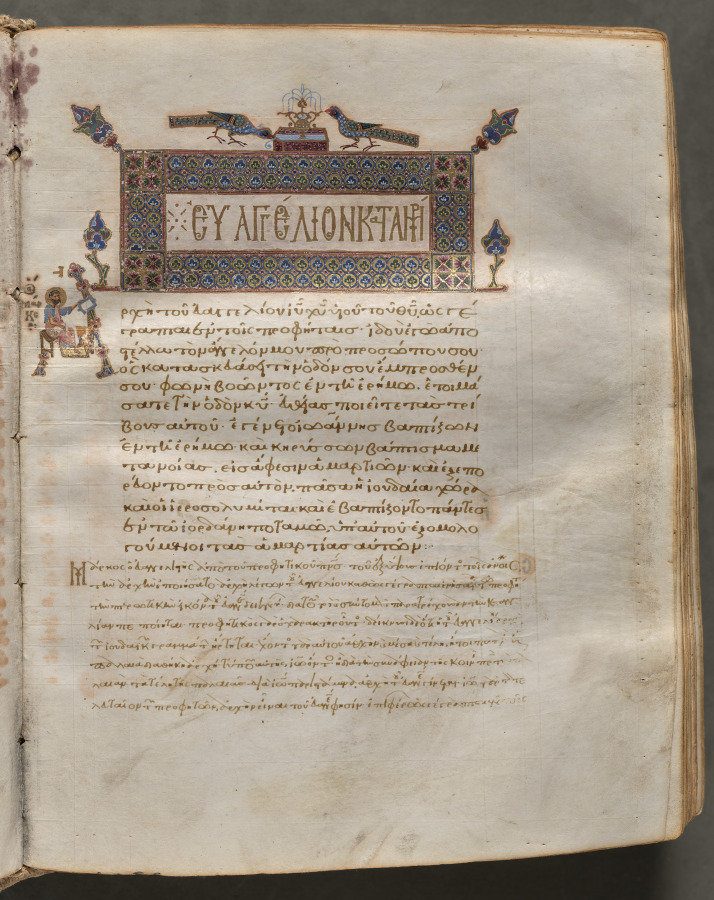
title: Portrait of Mark, folio 132 (recto), from a Gospel Book with Commentaries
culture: Byzantium, Constantinople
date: c. 1000–1100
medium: ink, tempera, and gold on vellum; leather binding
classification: Bound Volume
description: Each of the four gospels in this book opens on a page with brilliantly illuminated borders depicting the author of the text as well as birds-principally peacocks, symbols of the immortality of the soul-and fountains, representing the fountain of life and the salvation of the soul. This volume consists of 428 leaves with texts in Greek. Its level of sophistication suggests that it was probably written and decorated in a monastery in Constantinople.